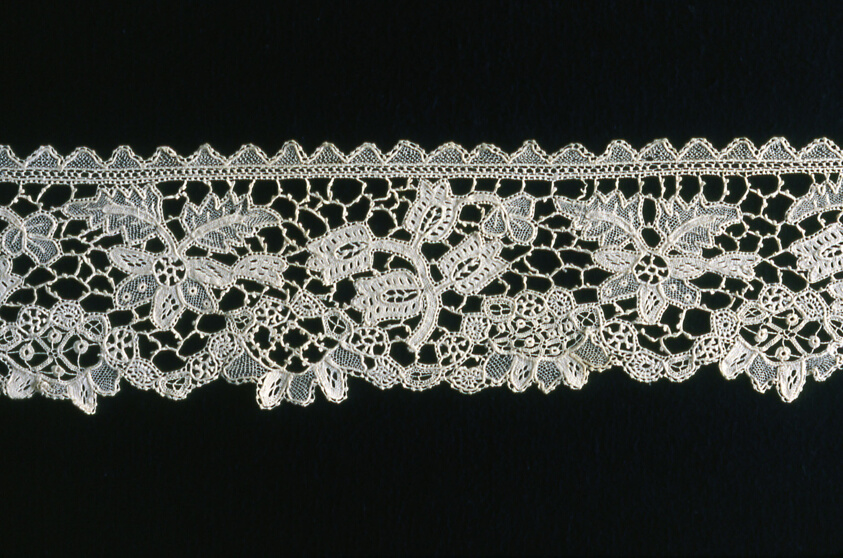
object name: Costume and Accessories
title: Border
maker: Ireland, Yarghal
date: 1880s/90s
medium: Cotton, silk, and linen, needle lace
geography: Ireland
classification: costume accessory; lace - needle; textile; costume; costume accessory - headdress; costume accessory worn above the waist